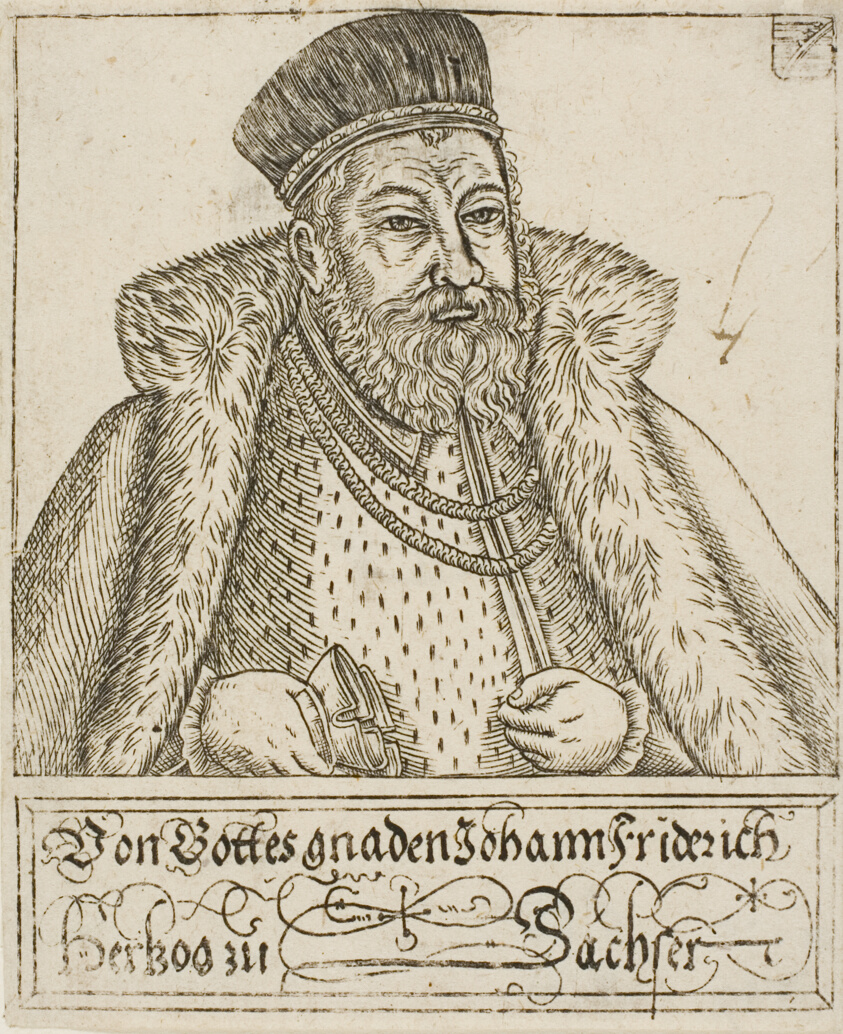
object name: Print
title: Johann Friedrich, from Saxon Dukes and Electors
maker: Balthasar Jenichen (German, died before 1621)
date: 1560/1621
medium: Etching in black on ivory laid paper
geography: Germany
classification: etching; print; prints and drawing